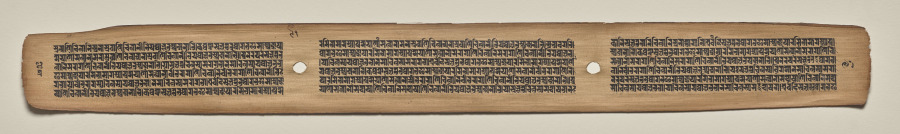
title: Text, Folio 91 (verso), from a Manuscript of the Perfection of Wisdom in Eight Thousand Lines (Ashtasahasrika Prajnaparamita-sutra)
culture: Eastern India, Bihar, Vikramashila Monastery. Painting: Nepal, Kathmandu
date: Sunday, September 14, 1119 (year 239 of the Newar Samvat in the month of Ashvina)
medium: gum tempera and ink on palm leaves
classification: Painting